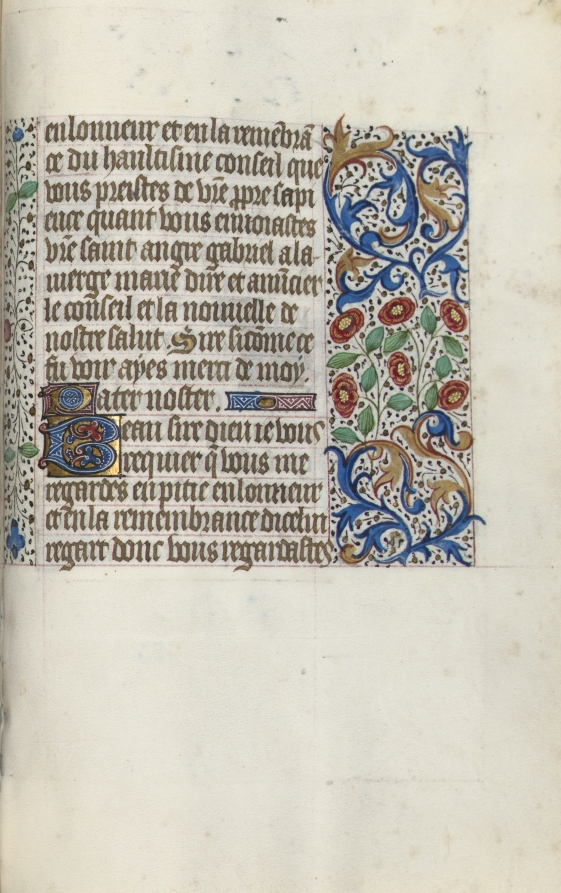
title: Book of Hours (Use of Rouen): fol. 152r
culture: France, Rouen, 15th century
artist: Master of the Geneva Latini (French, active Rouen, 1460–80)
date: c. 1470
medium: ink, tempera, and gold on vellum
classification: Bound Volume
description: In the late 1400s and early 1500s Rouen was an established and important center of book production. The city’s cathedral had a wealthy chapter that spent large sums of money to commission books and to maintain its extensive library. The stationers and booksellers would have likely been concentrated in or near the cathedral precinct. This artist, named after a manuscript now in Geneva, was Rouen’s principal illuminator during the second half of the 1400s.